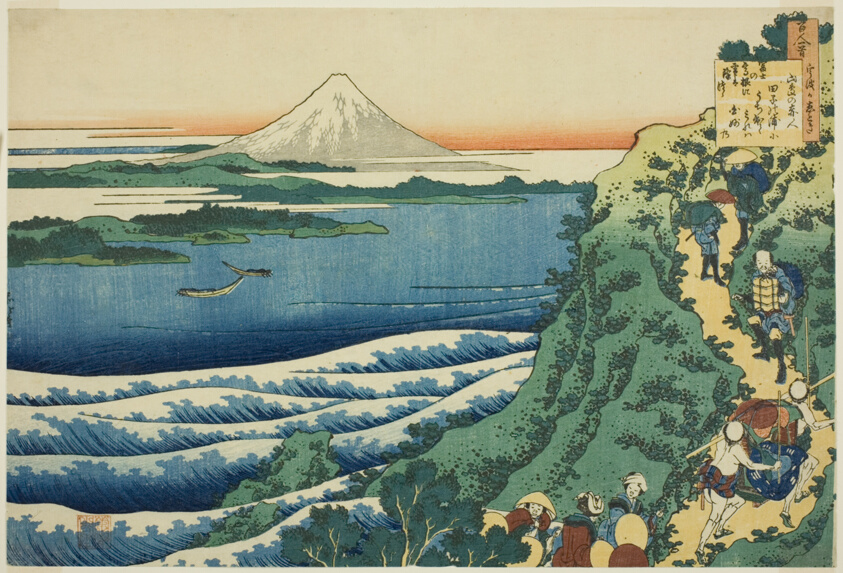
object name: Print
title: Poem by Yamabe no Akahito, from the series "One Hundred Poems Explained by the Nurse (Hyakunin isshu uba ga etoki)"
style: Japanese (culture or style)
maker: Katsushika Hokusai 葛飾 北斎; Japanese, 1760-1849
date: c. 1835/36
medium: Color woodblock print; oban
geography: Japan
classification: woodblock print; print; asian art